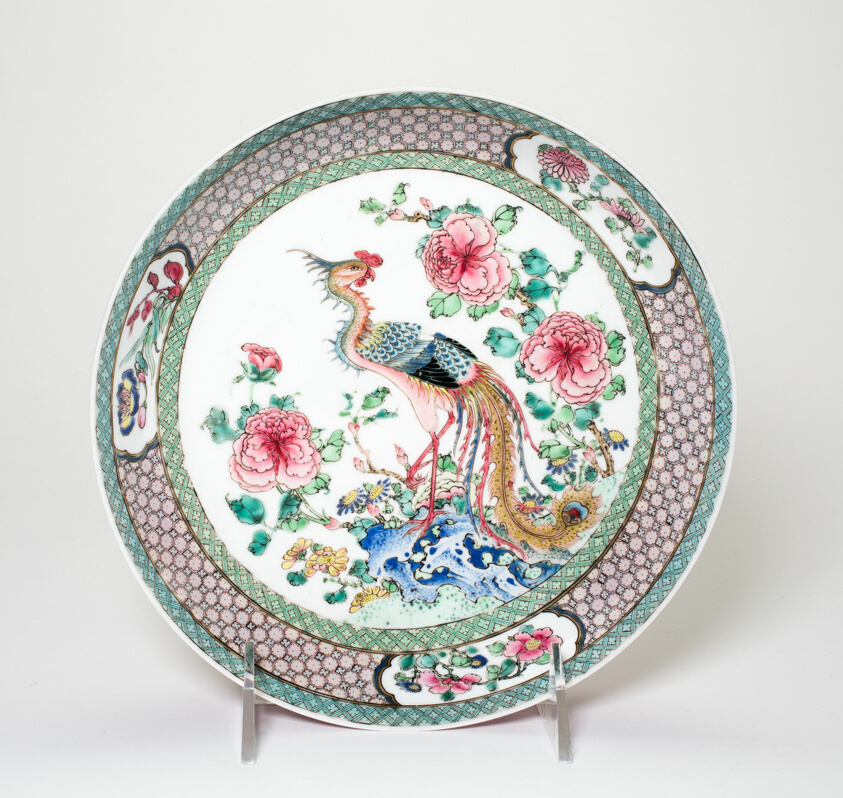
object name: Decorative Arts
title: "Ruby-Back" Dish with Phoenix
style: Chinese (culture or style)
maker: China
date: Qing dynasty (1644–1911), 18th century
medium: Porcelain with overglaze famille rose enamel decoration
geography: China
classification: plate (general, dish); porcelain; dish (vessel); asian art; ceramics; decorative arts